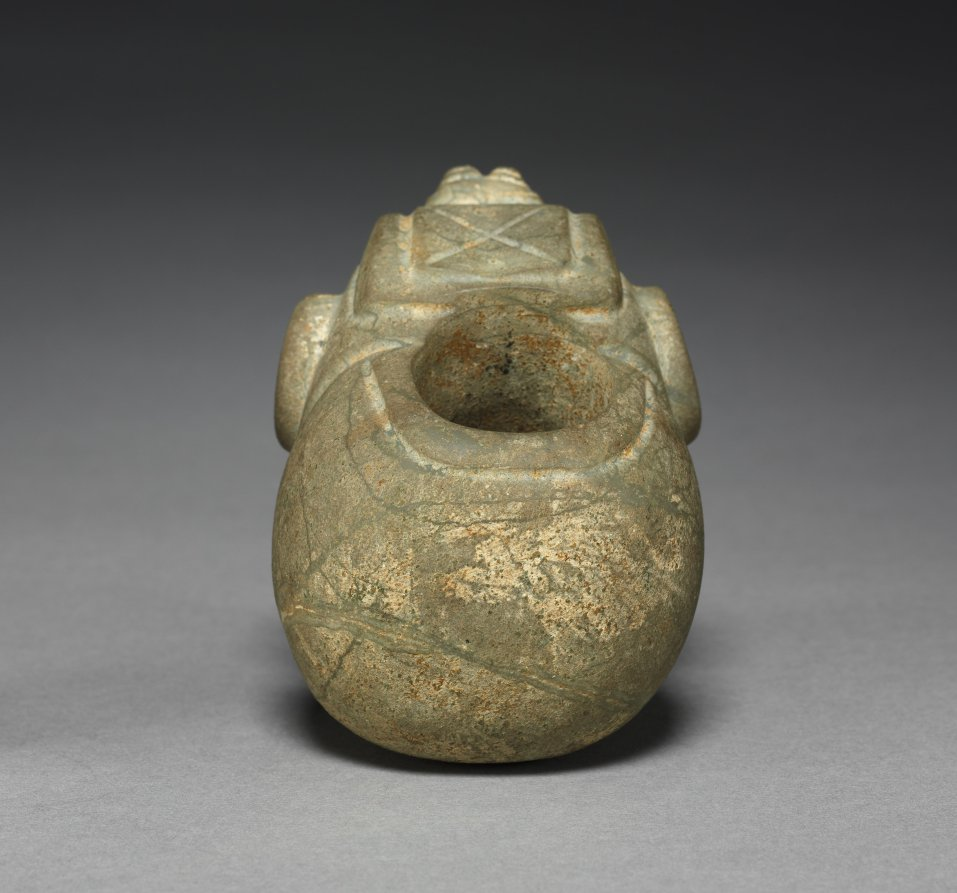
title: Ceremonial Mace (Club) Head: Bird (Male Curassow?)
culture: Costa Rica, Southern Nicoya region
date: 300 BCE–600 CE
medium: stone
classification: Sculpture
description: Probably once mounted on wooden shafts, these objects could have served as symbols of chiefly authority, group insignia, the heads of ceremonial weapons, or all three. They eventually were placed in elite graves. The bird may be a male curassow and the feline, a jaguar.